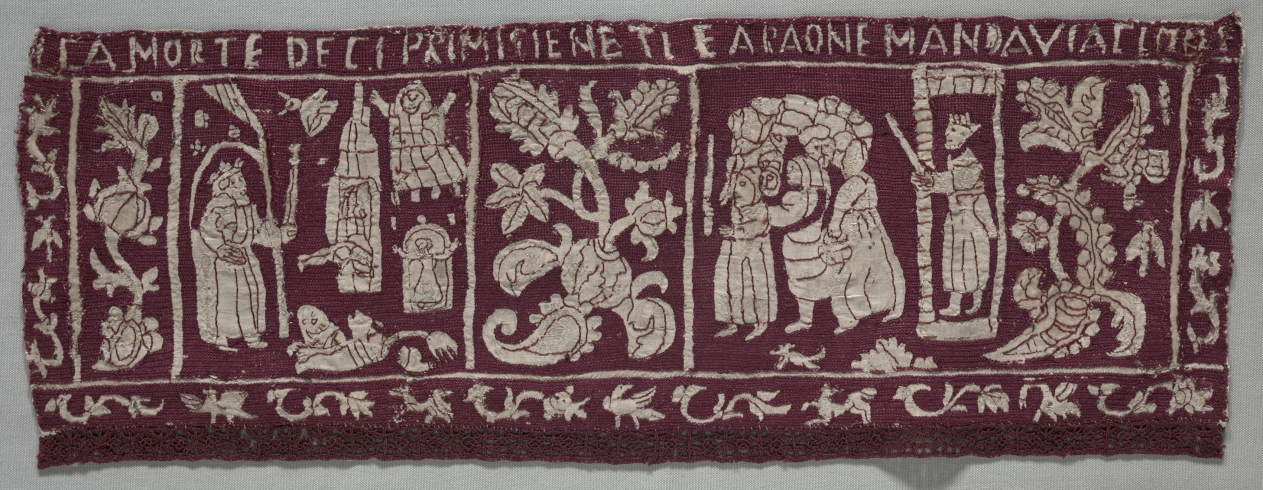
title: Embroidered Border: The Death of the First Born and the Israelites Sent Away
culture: Italy, 16th-17th century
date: 1500s-1600s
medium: Plain weave linen; embroidery in silk; attached border of needle lace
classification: Embroidery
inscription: Embroidered lettering in upper margin: LA MORTE DECI PRIMIGIENETI E ARAONE MAN[O]AVIACI[…]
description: The border fragments on the left tell the story of the Israelites baking unleavened bread during the first Passover, after which they were delivered out of captivity in Egypt. In the top panel, bakers mix and knead the dough; the bottom panel shows the bakers standing on a tiled floor while placing the bread into a brick oven. This common household scene would have been familiar to Italian audiences during the Renaissance. Two fragments depict events recorded in the book of Exodus. In the top panel, the pharaoh is shown releasing the Israelites after the last plague (1939.355). In the bottom panel, he changes his mind and pursues them across the parted Red Sea, only to be swallowed up after the Israelites safely crossed (1939.352).